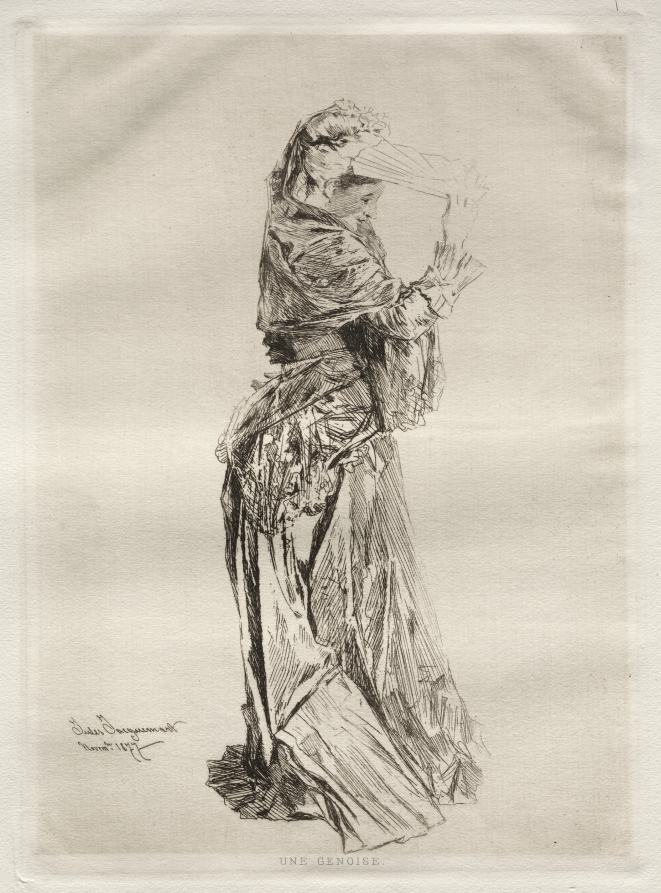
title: A Genoise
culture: France, 19th century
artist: Jules Jacquemart (French, 1837–1880)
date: 1877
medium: etching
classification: Print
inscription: in plate, lower right: Jules Jacquemart; lower left in plate: Novembre 1877